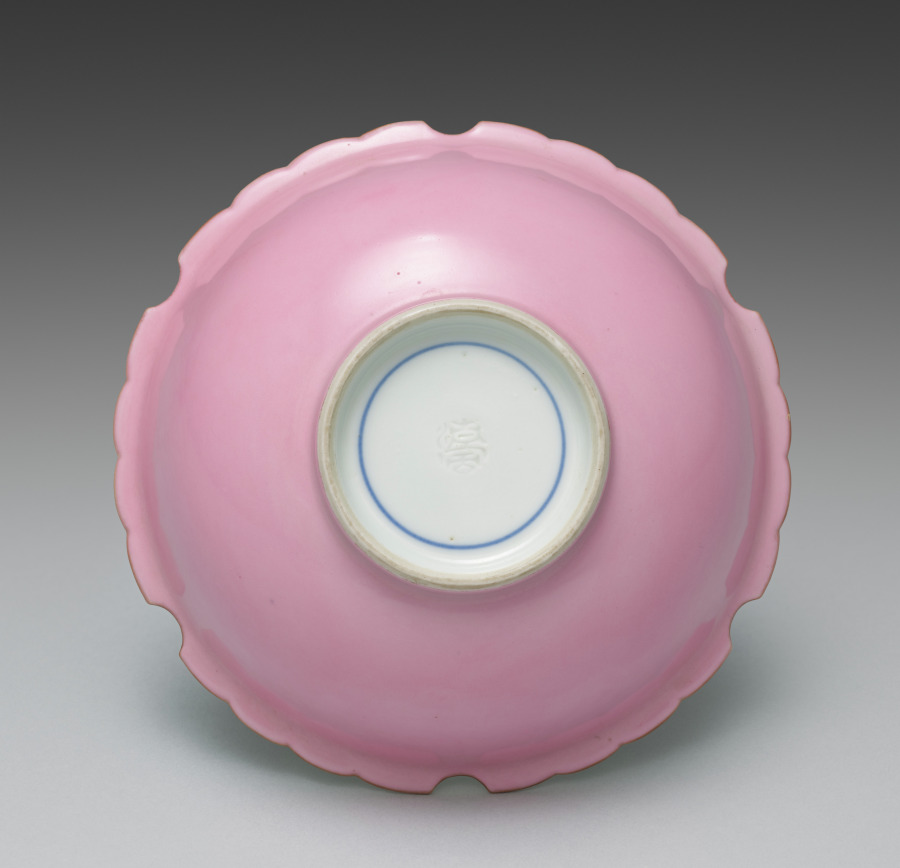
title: Dish from Snow-Flake Side Dishes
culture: Japan, Meiji period (1868–1912)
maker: Seifū Yohei III (Japanese, 1851–1914)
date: 1893–1914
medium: One from a set of six porcelain dishes; porcelain with lobed rims and pink glaze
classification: Ceramic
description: According to the box lid, this set of 6 side dishes, or mukōzuke, are “snow-flower style” (sekkashiki), having mouths shaped like snowflakes. Their mouths, which have 6 lobes and scalloped edges, are traced with brown iron oxide at the rim. The outside of each bowl is glazed with a very bright pink over the basin and foot, and the inside is left white. From directly above, one sees a snowflake-like shape, and from the side, they seem to float above a rosy ground.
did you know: The box for this set of dishes has an inscription on the side noting that they were for a person with the family name Nakamoto.